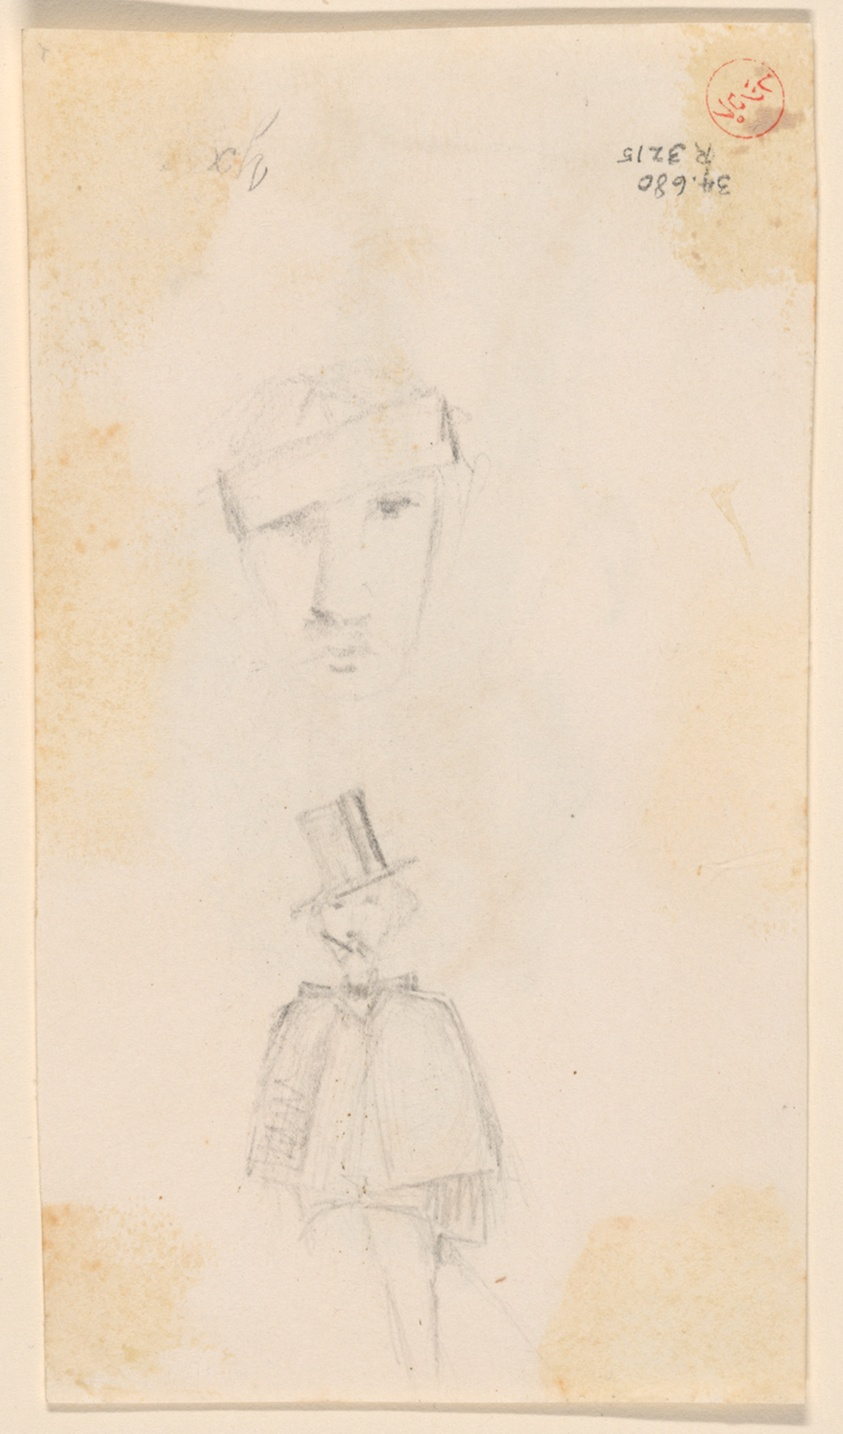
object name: Drawing and Watercolor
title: Hussar (recto) Man with a Top Hat and Bandaged Head (verso)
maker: James McNeill Whistler (American, 1834-1903)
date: 1854/55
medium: Pen and black ink over graphite (recto), and graphite (verso), on cream wove paper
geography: United States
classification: pen and ink drawings; drawings (visual works); prints and drawing; paper